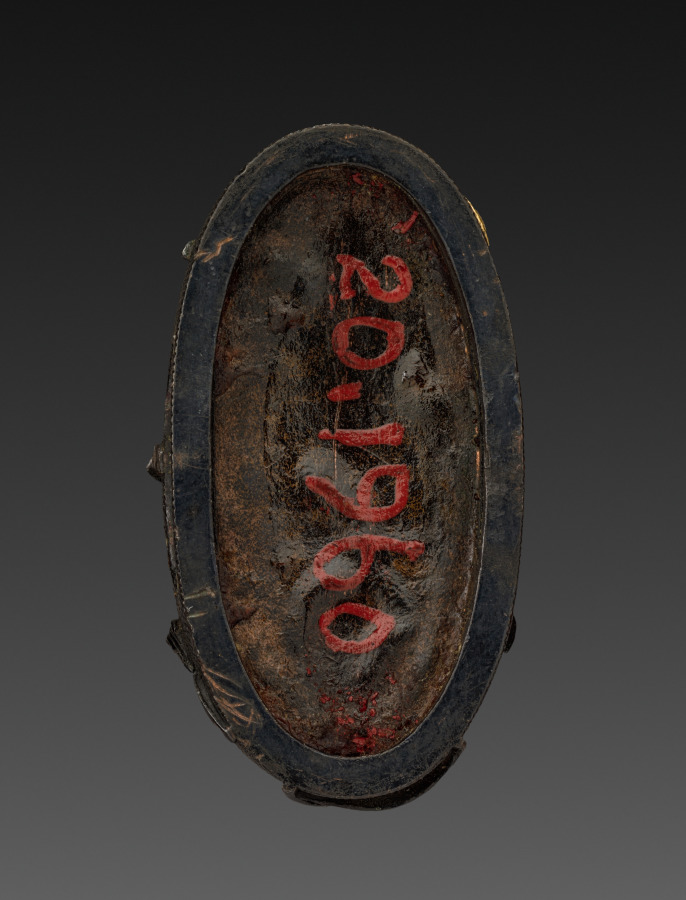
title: Sword-Hilt Pommel (Kashira)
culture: Japan, Edo period (1615–1868)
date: 1700–1850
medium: shakudo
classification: Arms and Armor